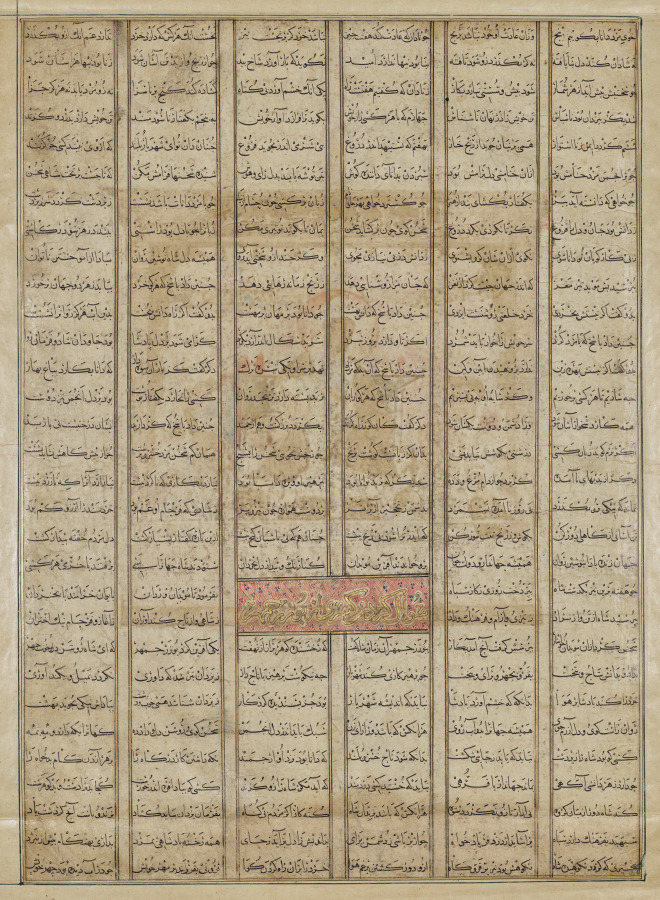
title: Persian Verses: The Fortieth Year of King Kisra Nushirwan's Reign and the Story of Buzurgmihr (recto) from a Shahnama (Book of Kings) of Firdausi (940–1019 or 1025)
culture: Iran, Tabriz, Ilkhanid period (1256-1353)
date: 1330–35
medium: Ink and opaque watercolor on paper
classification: Manuscript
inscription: Script: Naskh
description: Mongol interest in the production of illustrated manuscripts eventually focused on Persian epic poetry. The Shahnama, a compilation of the epics and tales of Iran's legendary heroes, was a natural choice; the book included many subjects that suited Mongol taste, such as banquets, battles, hunting, and magical or fantastic events. The painting on the other side of this page is of the Sasanian ruler of Iran, Khusraw I Anushirwan (531–579), descendant of Bahram Gur. Above the king's head an inscription reads, "Picture of Nushirwan the Just." The figure in the elaborate turban to the left of the king is probably the young Minister Buzurgmihr, famous for his wisdom and virtue. To celebrate the explanation of a troublesome dream by Buzurgmihr, Nushirwan held a series of seven banquets. The text around this painting describes the fifth banquet.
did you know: The Mongol rulers of Iran placed high value on illustrated manuscripts, especially histories, and established royal library-workshops.